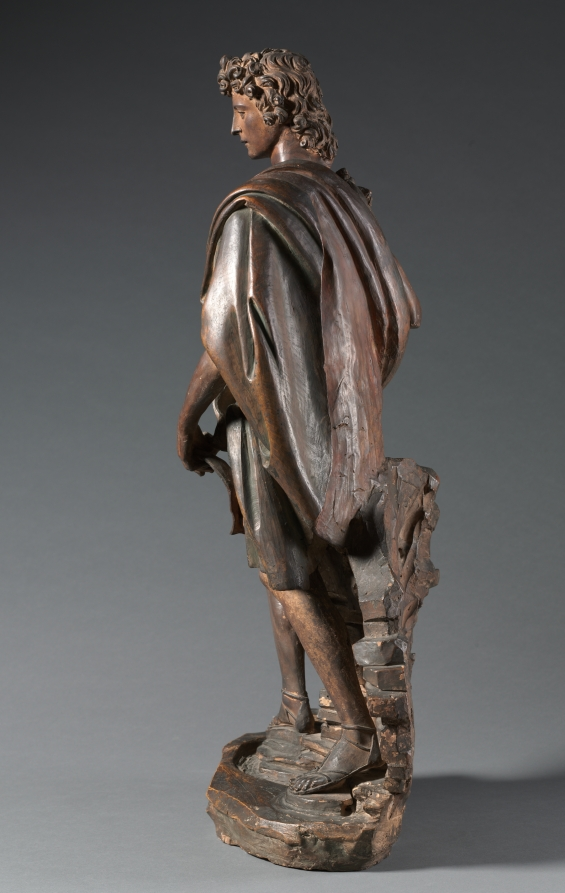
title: Saint John the Baptist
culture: Italy, Florence, 16th century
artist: Master of the Saint John Statuettes (Italian)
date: c. 1500–1525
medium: terracotta with traces of polychromy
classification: Sculpture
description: This statuette belongs to a group of terracotta sculptures representing David (from the OldTestament) and Saint John (from the New Testament) produced by a still unidentified Florentine artist and his studio in the late 1400s and early 1500s. Giventheir scale, it seems likely that these sculptures were intended for use in private homes rather than churches.